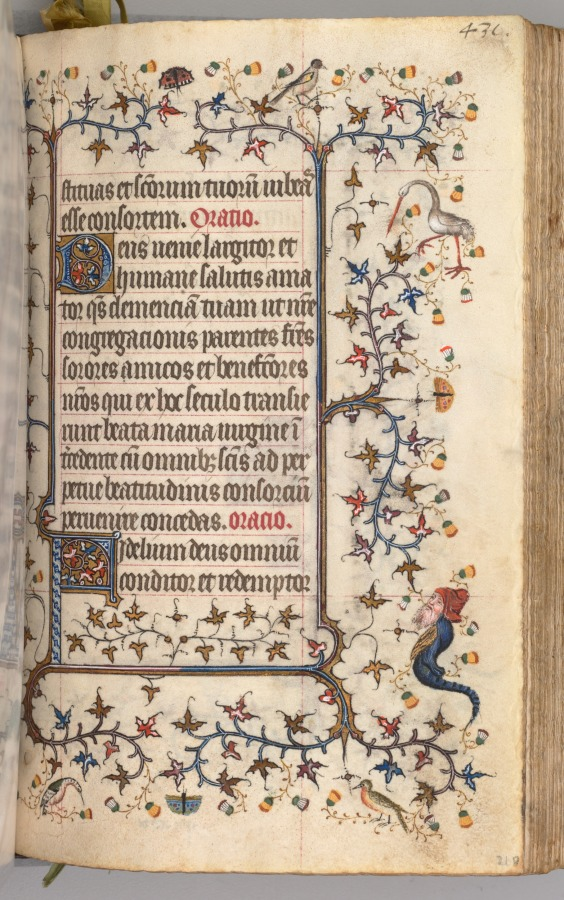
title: Hours of Charles the Noble, King of Navarre (1361-1425): fol. 210r, Text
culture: France, Paris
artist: Master of the Brussels Initials and Associates (French)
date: c. 1405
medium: ink, tempera, and gold on vellum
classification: Bound Volume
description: This precious volume was obviously highly prized by its owner, the French-born King of Navarre, who had his coat of arms painted on no less than twenty folios. Rather than directly commissioning this manuscript from a specific workshop, it seems that Charles the Noble acquired his book of hours -- perhaps ready-made for the luxury market -- while on a trip to Paris in 1404-05. A collaborative effort, six painting styles are evidenced within the pages of this codex, those of two Italians, two Frenchmen, and two Netherlanders. The painter who was responsible for the planning and decoration of the book, and who produced seventeen of the large miniatures, was a Bolognese artist known as the Master of the Brussels Initials. His principal assistant, responsible for most of the borders, was a Florentine who signed his name "Zecho" da Firenze on folio 208 verso.